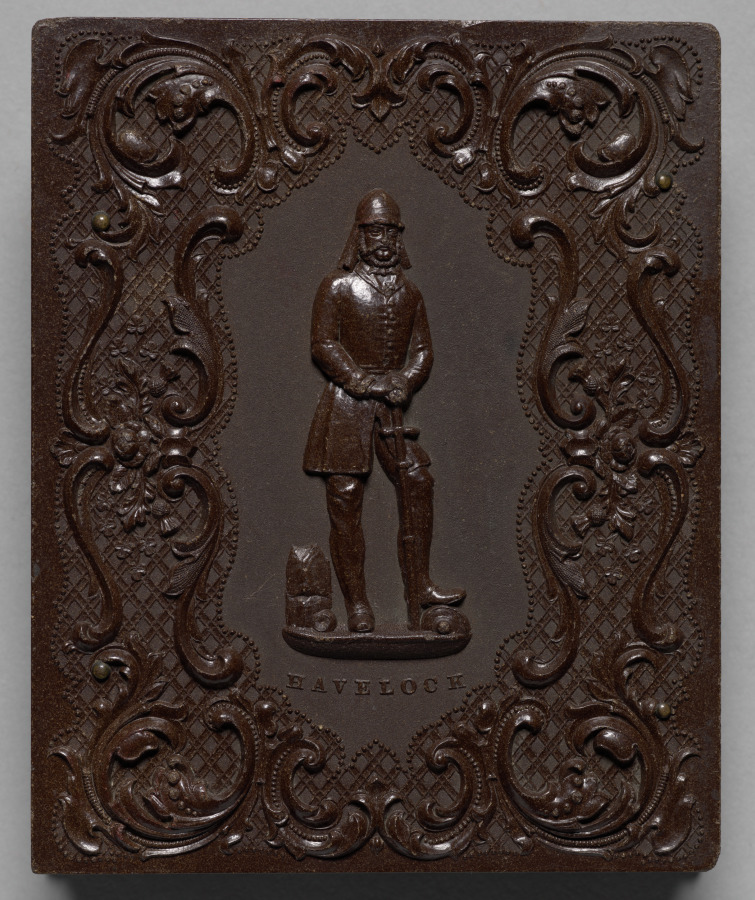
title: The Homework Table & Parents of Five Children Doing Homework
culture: America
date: c. 1858–60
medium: daguerreotype, quarter plate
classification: Photograph